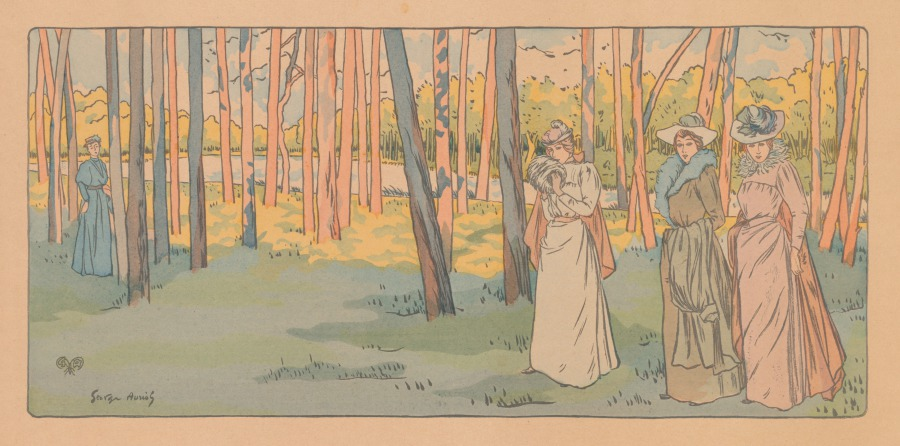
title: Promenade sur Bois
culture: France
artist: George Auriol (French, 1863–1938)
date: c. 1900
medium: color lithograph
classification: Print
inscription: Recto: In stone, lower left corner: Georges Auriol [cursive]; lower right margin, printed script: Offert par E. Greningaire, coloriste.Verso: lower right, in graphite: 010591 [enclosed with graphite rectangle]